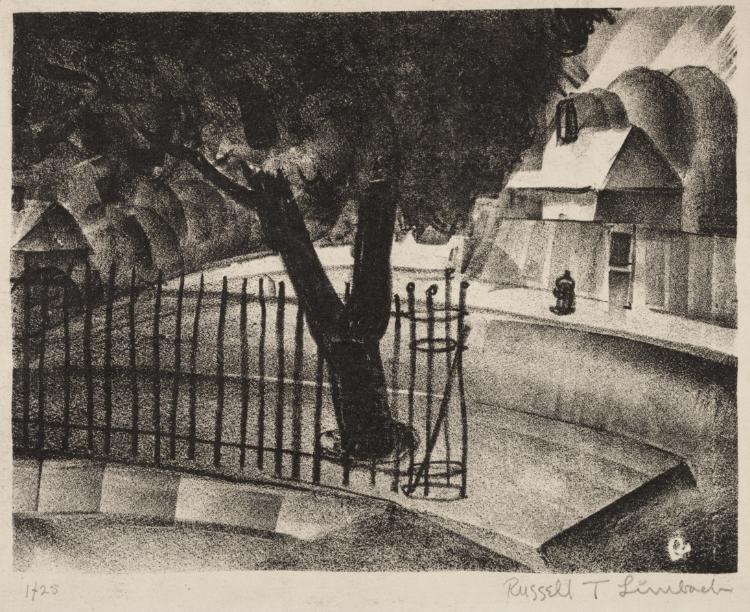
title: The Iron Fence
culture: America, Ohio, Cleveland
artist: Russell T. Limbach (American, 1904–1971)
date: c. 1927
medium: lithograph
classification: Print